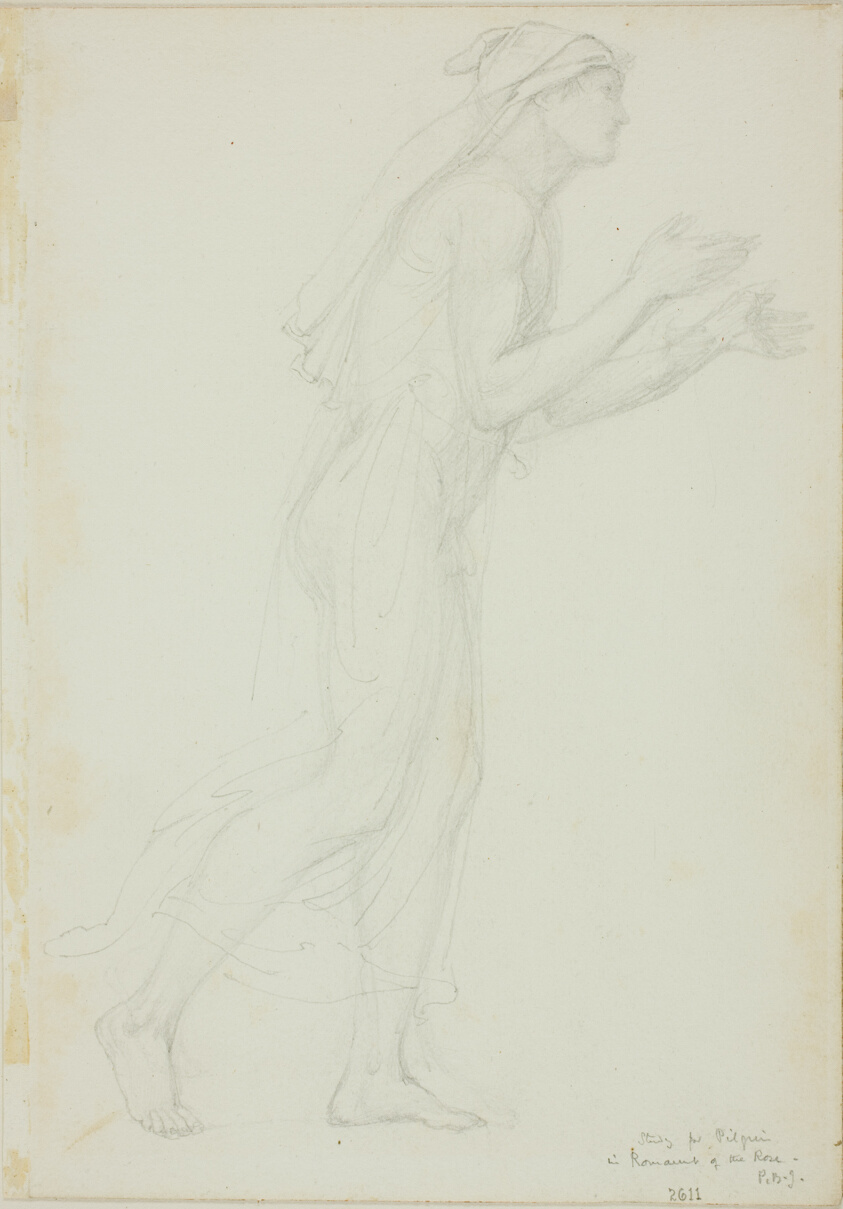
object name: Drawing and Watercolor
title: Study for Pilgrim in Romaunt of the Rose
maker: Sir Edward Burne-Jones (English, 1833-1898)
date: c. 1873–77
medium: Graphite on ivory wove paper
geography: England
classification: graphite; drawings (visual works); prints and drawing